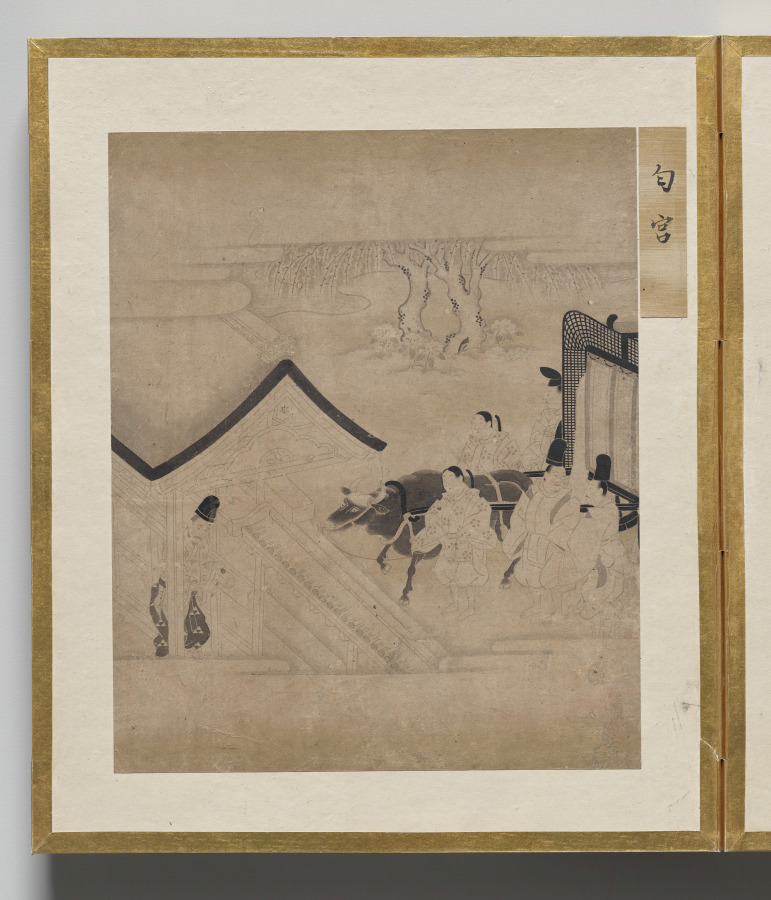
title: His Perfumed Highness from Album of Illustrations for the Tale of Genji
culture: Japan, Edo period (1615–1868)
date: 1600s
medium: painting in an accordion-style album; ink, light color, and gold on paper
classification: Bound Volume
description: This album contains illustrations for the classic literary work the Tale of Genji, authored in the 1000s by Murasaki Shikibu, an aristocrat of the Heian period (794–1185) court. The scenes are painted in the “white drawing” (hakubyō) mode, in which a fine ink line is used to depict figures and spaces with great subtlety, punctuated only occasionally by traces of red pigment for a character’s lips, a detail of a garment, or a decorative element. These two scenes illustrate episodes from the chapters “Thin Veil of Cloud” (Usugumo) and “Barrier Gate” (Sekiya).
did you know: The illustrations are identified by chapter title in cartouches to the upper right of the paintings.